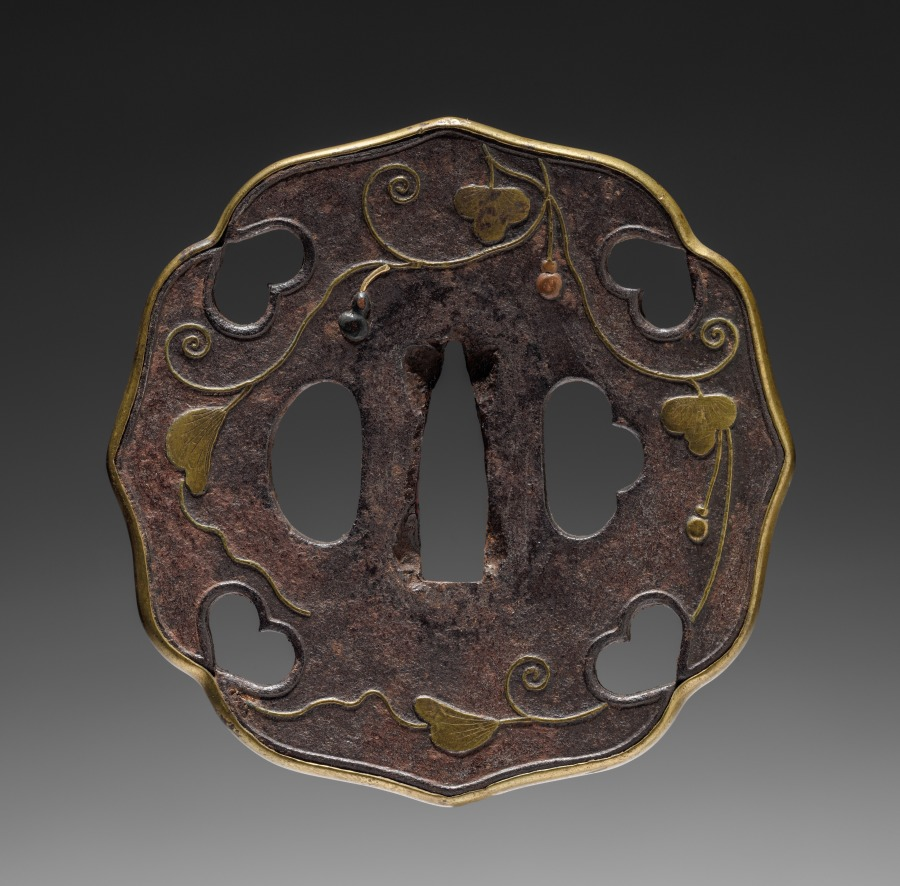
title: Sword Guard (Tsuba)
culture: Japan, possibly Edo period (1615-1868)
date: c. 1615–1868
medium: iron with brass bound edge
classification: Arms and Armor